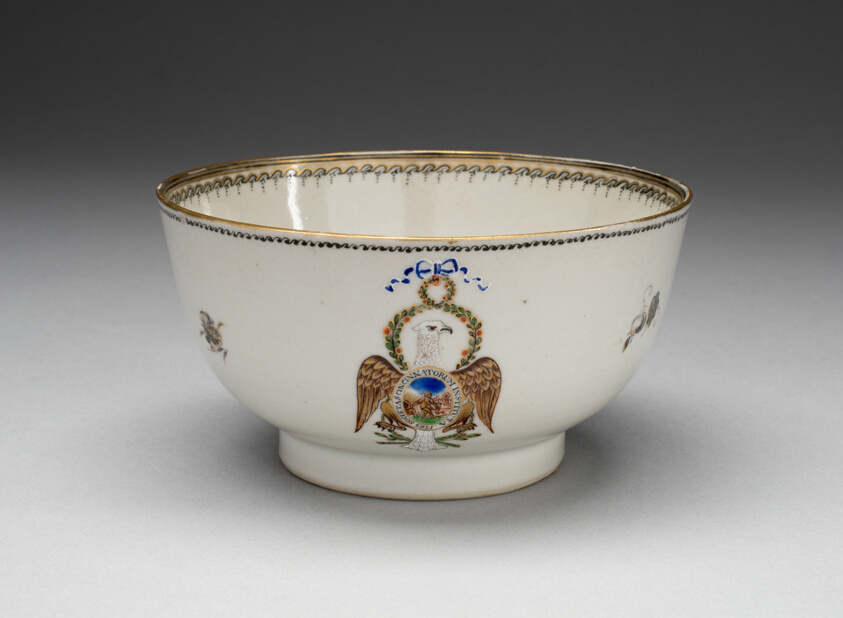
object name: Ceramics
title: Breakfast Cup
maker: China; Chinese, made for the American market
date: c. 1785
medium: Porcelain and enamel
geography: China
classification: drinking vessel; porcelain; art of the americas; ceramics; decorative arts; American market; chinese export porcelain; pottery